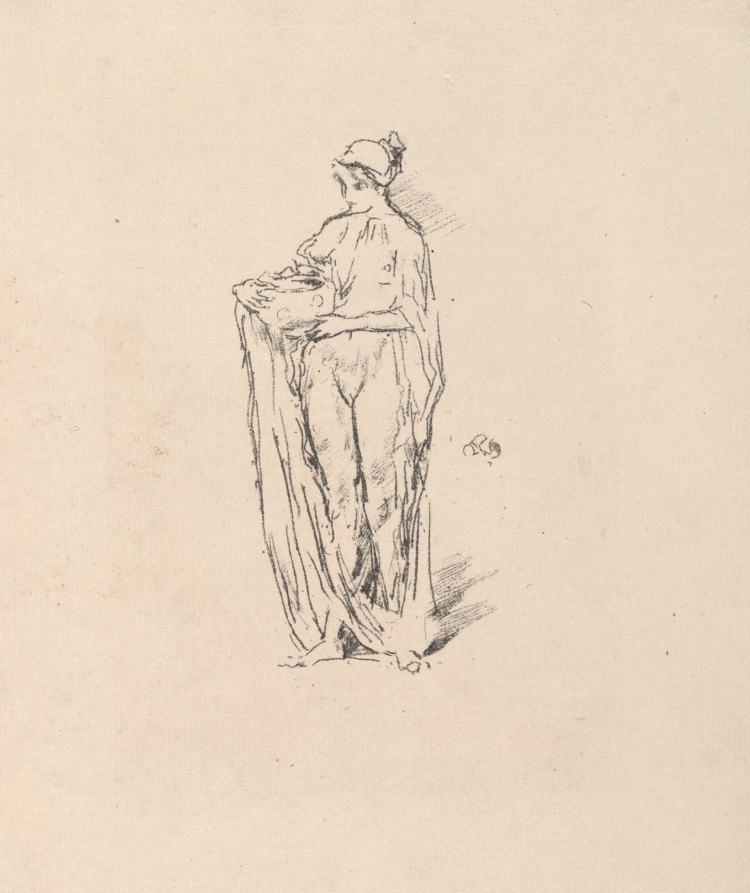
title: Girl with Bowl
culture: America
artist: James McNeill Whistler (American, 1834–1903)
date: 1895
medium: lithograph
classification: Print